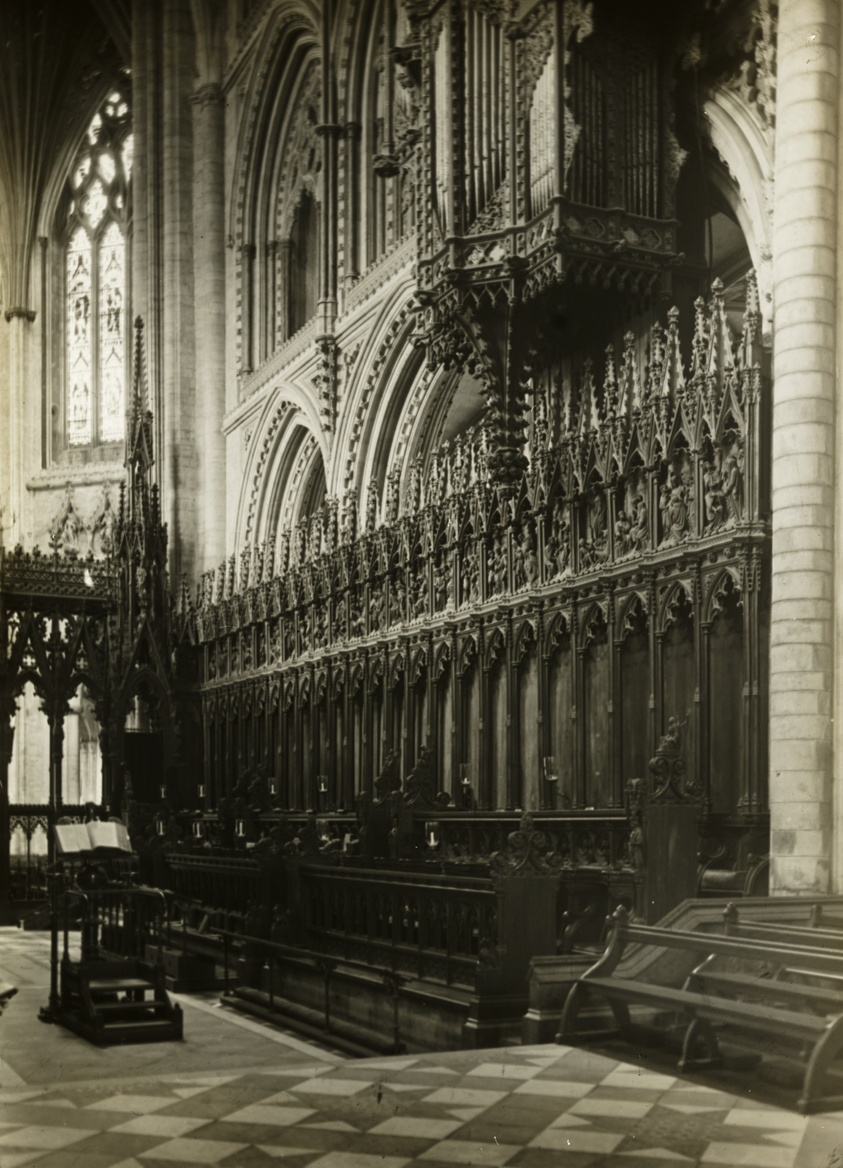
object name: Photograph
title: Ely Cathedral: Choir Stalls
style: Pictorialism, 19th century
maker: Frederick H. Evans (English, 1853–1943)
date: 1891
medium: Lantern slide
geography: England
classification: photograph; photography